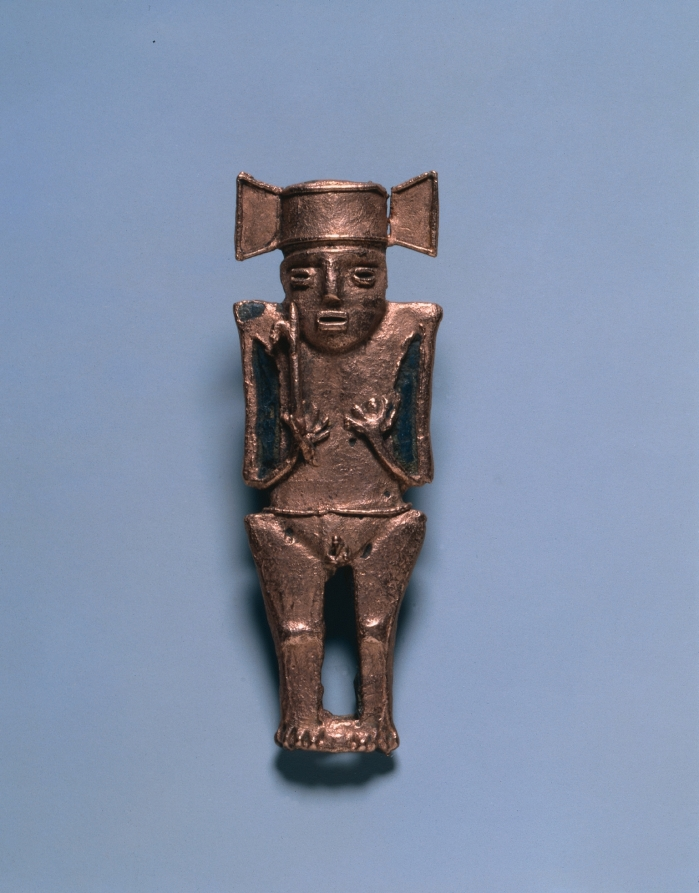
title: Tunjos (Votive Offering Figurine)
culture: Colombia, Muisca style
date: c. 900–1550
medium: cast gold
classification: Metalwork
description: Unlike the other gold ornaments in this gallery, tunjos were not worn; instead, they served as offerings that were deposited in sacred places, such as lagoons and caves. They often depict humans who hold something-here a container with a head (1947.22), a spear thrower (1947.19), and a bird-tipped (1957.25). The subject must have corresponded to a benefit being asked from the gods. Perhaps because they were not meant for display, tunjos were not finished after lost-wax casting. Flaws remain uncorrected, surfaces are unpolished, and gold that backed into the sprue (pouring channel) was left in place, creating the button-like form at the bottoms of 1947.24 and 1947.17, which were cast upside down.